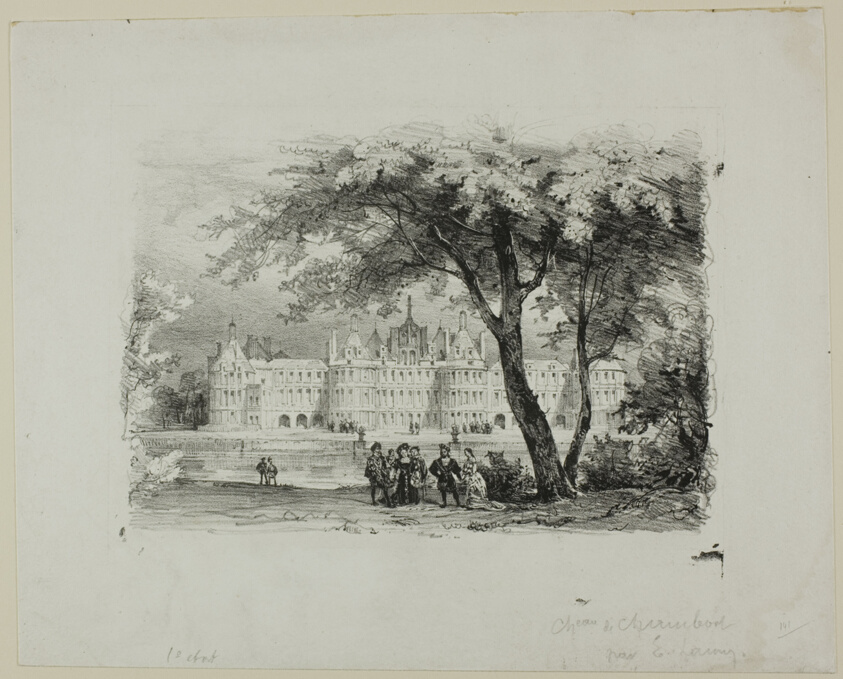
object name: Print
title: Château de Chambord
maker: Eugène L. Lami; French, 1800-1890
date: 1820–35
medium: Lithograph in black, with scraping on stone, on ivory wove paper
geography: France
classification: lithograph; print; prints and drawing